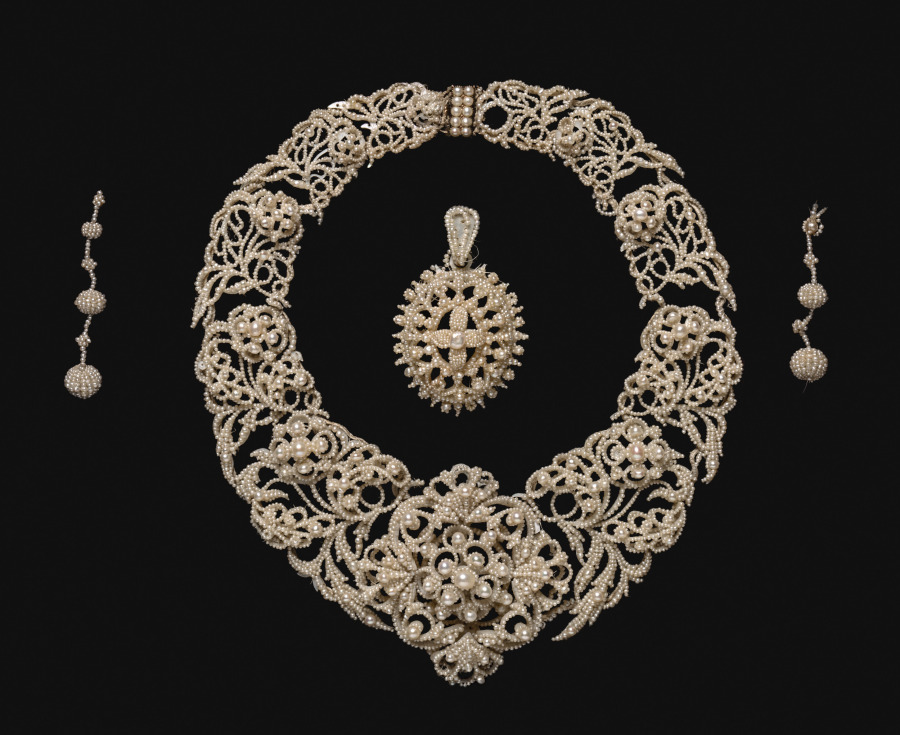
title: Parure: Necklace, Pendant, Earrings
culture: England, 19th century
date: c. 1850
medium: seed pearl on mother-of-pearl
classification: Jewelry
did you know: A parure is a set of various items of matching jewelry popular in Europe in the early 1800s; they could include a variety of pieces such as a necklace, earrings, brooch, bracelet, or tiara.